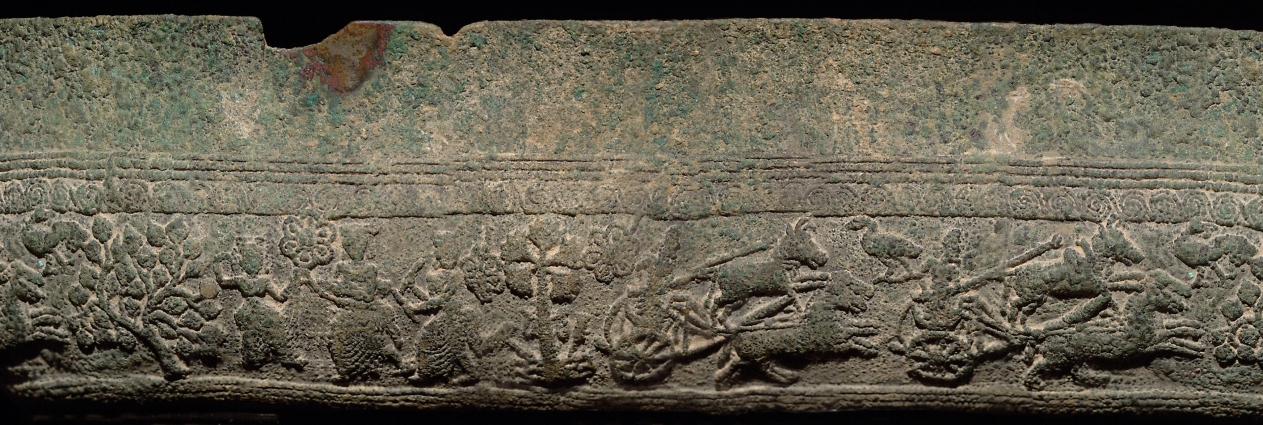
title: Libation Cup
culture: India, Maurya period (322–185 BCE)–Shunga period (185–78 BCE)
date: c. 235–185 BCE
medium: bronze, lost wax technique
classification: Metalwork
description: The remarkably clear, tiny carvings in an uninterrupted frieze around the lower section include one sacred palm tree and one fig tree (ficus religiosa) that divide the space into two main scenes. One features female musicians, the other has two chariots, each drawn by a pair of galloping horses. Bulls, birds, and flowers fill the background spaces. This cup is from a group found in an area with close links to Indo-Greek kingdoms, and the chariots and framing motifs reveal knowledge of Hellenistic art.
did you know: The tree carved into the cup is of the same species as the Bodhi tree, under which the Buddha reached enlightenment.